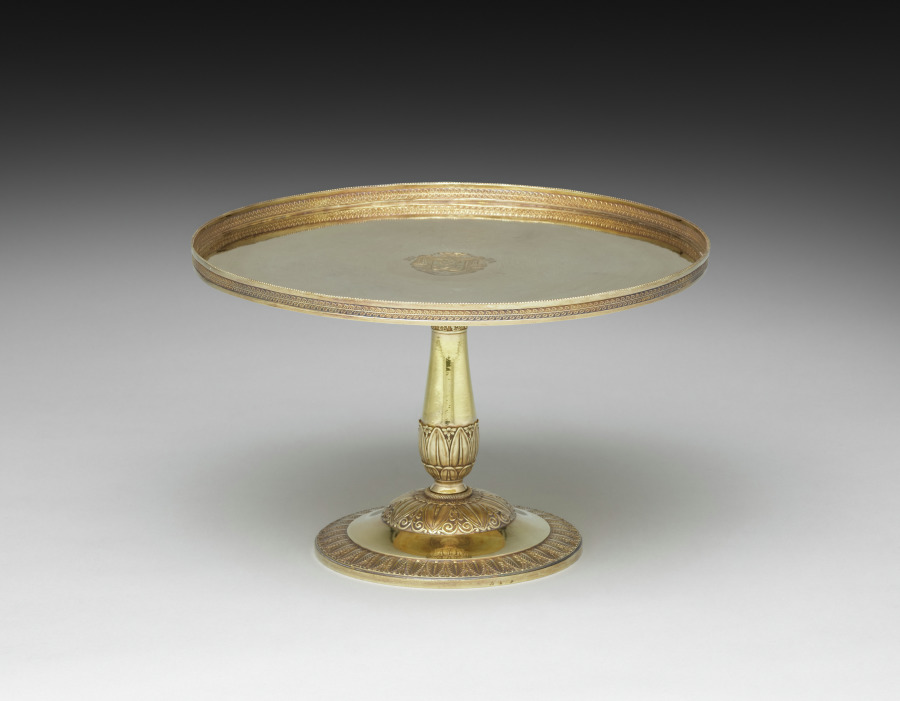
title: Tazza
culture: Italy, Rome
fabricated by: Pietro Paolo Spagna (Italian, 1793–1861)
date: c. 1815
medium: silver gilt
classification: Silver